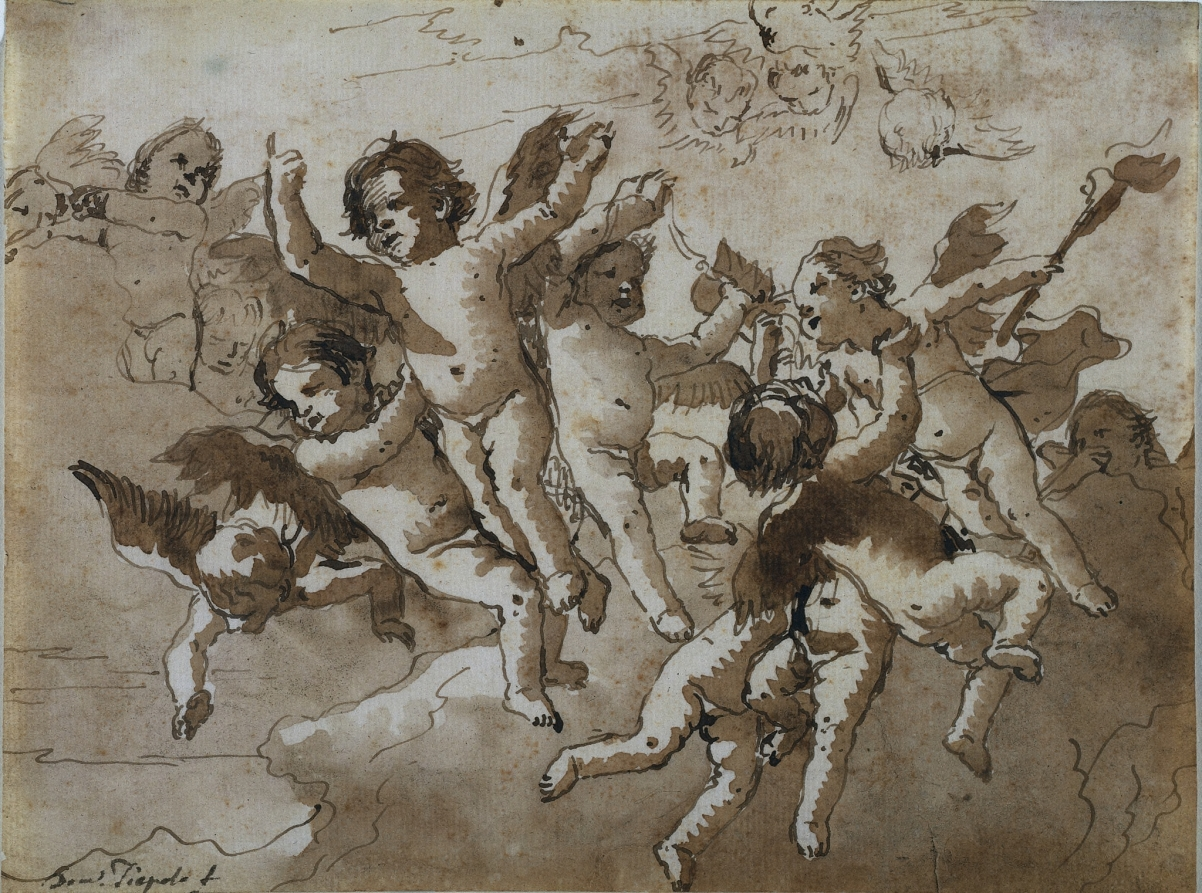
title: Cupid in the Clouds with Attendant Cherubs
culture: Italy, 18th century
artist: Giovanni Domenico Tiepolo (Italian, 1727–1804)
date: 1757 or after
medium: pen and brown ink and brush and brown wash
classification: Drawing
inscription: signed, lower left, in brown ink: Dom. Tiepolo f ; VERSO, lower left, in graphite: [s] [circled] F / F E O [sideways] ; across bottom, in graphite: C - 177 - [Bt from Manillo Mss?] Venice 1929 ; lower center, in graphite: Dom Tiepolo [Jr?]